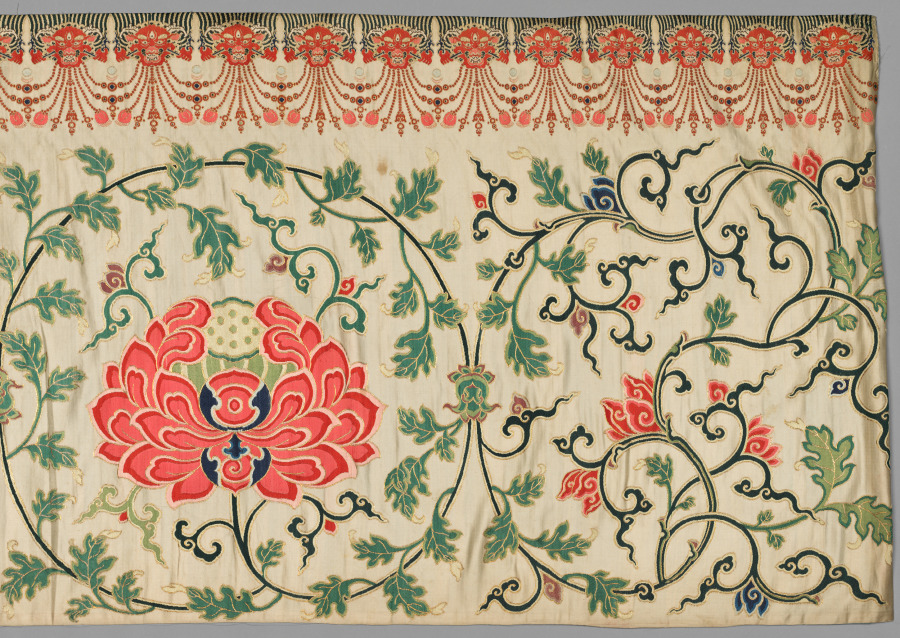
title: Brocaded Strip, known as "Imperial Tribute Brocade"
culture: China, Qing dynasty (1644-1911)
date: c. 1770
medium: brocaded satin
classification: Textile